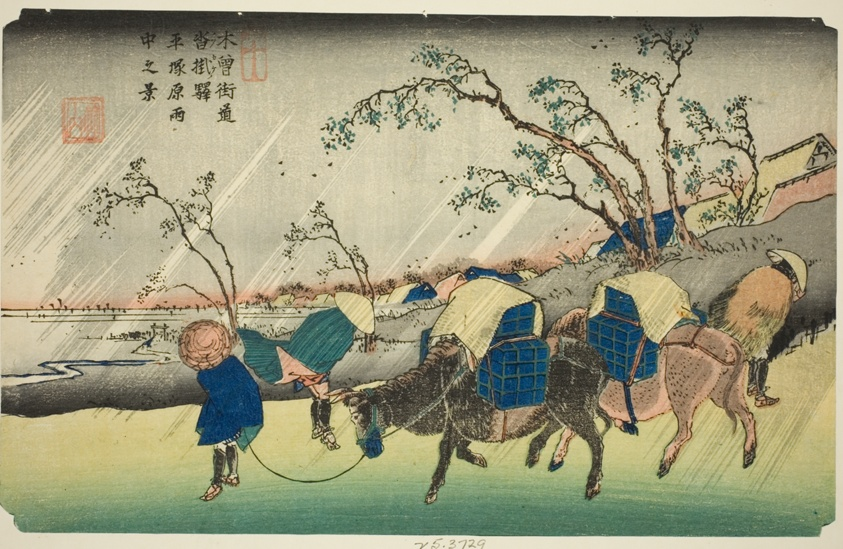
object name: Print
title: No. 20: Rain on the Hiratsuka Plain near Kutsukake Station (Niju: Kutsukake no eki, Hiratsukahara uchu no kei), from the series "[Sixty-nine Stations of the] Kisokaido"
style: Japanese (culture or style)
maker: Keisai Eisen (Japanese, 1790-1848)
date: c. 1835/36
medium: Color woodblock print; oban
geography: Japan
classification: woodblock print; print; asian art